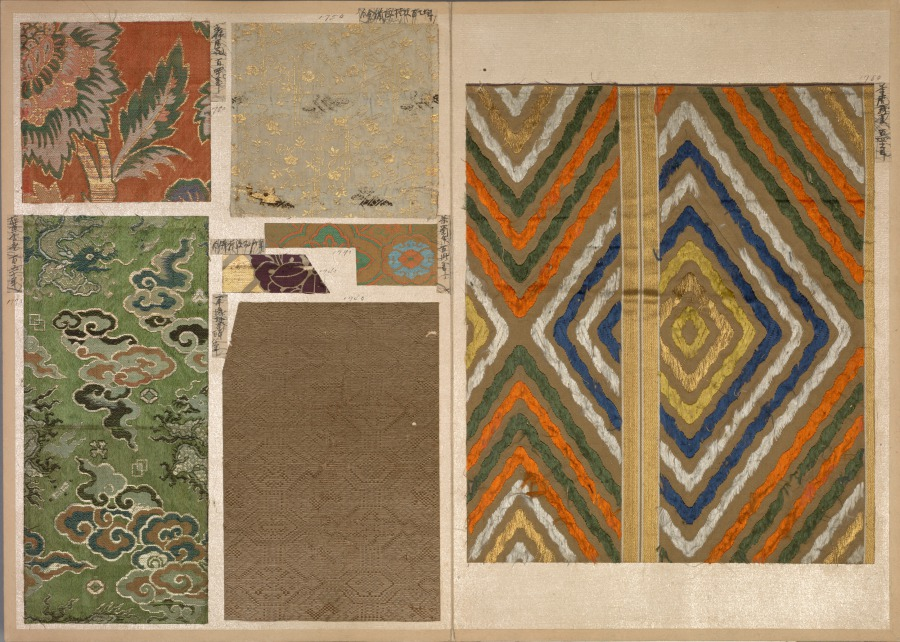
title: Album of Textile Samples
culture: Japan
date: 1790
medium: silk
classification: Textile